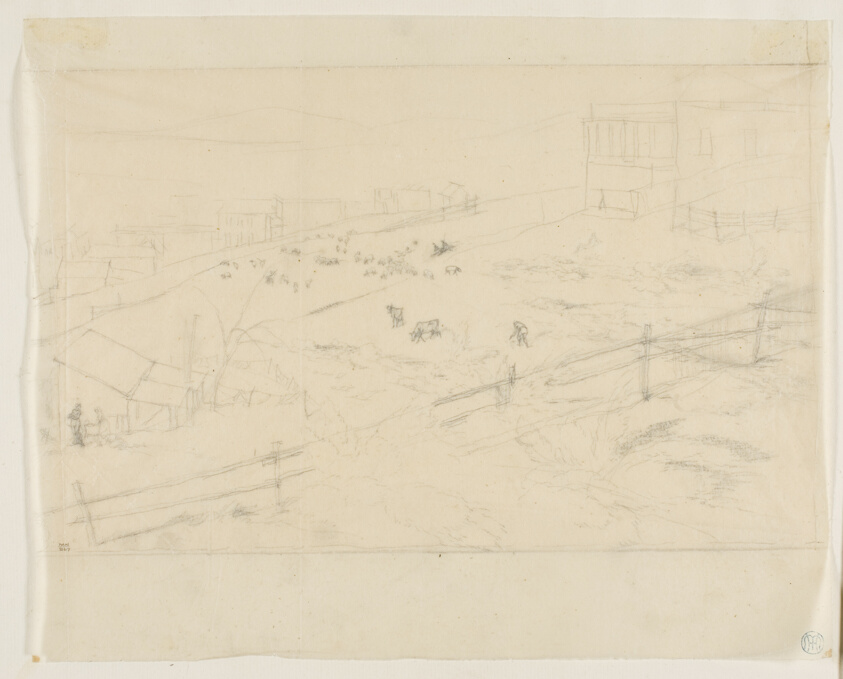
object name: Drawing and Watercolor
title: San Francisco, Study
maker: Charles Meryon (French, 1821-1868)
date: 1855–56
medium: Graphite on ivory wove tissue, hinged to ivory laid paper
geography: France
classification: graphite; drawings (visual works); prints and drawing